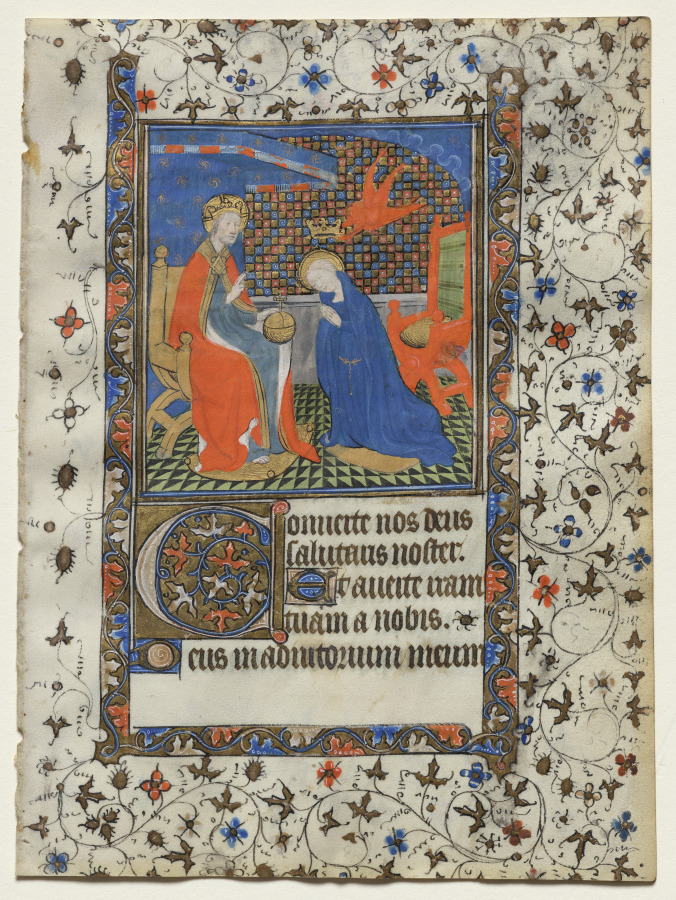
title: Bifolio from a Book of Hours: Coronation of the Virgin (recto)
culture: France, Paris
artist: workshop of Boucicaut Master (French, Paris, active about 1410–25)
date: c. 1415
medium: ink, tempera, and gold on vellum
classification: Manuscript